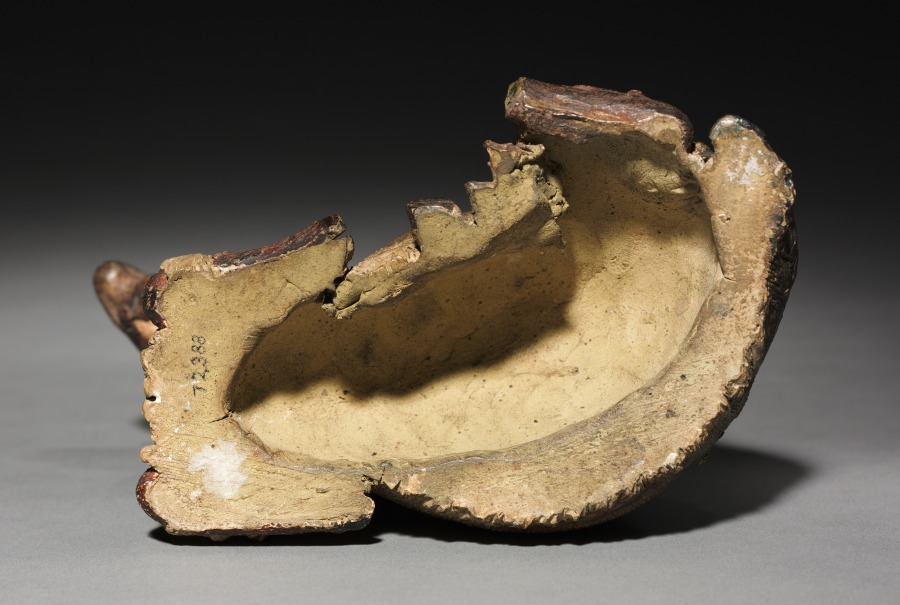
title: Figure from a Crèche: Sitting Ram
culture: Italy, Naples, late 18th-early 19th century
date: 1780–1830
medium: painted terracotta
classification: Sculpture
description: The practice of creating scenes of the Nativity for the home dates from the early 1700s in Italy, where people began to set up doll-like figures of about a foot or less in height. The custom was particularly popular in Naples around 1800, where crèche scenes (crèche means cradle, or crib) included many figures, whose heads and hands of painted terracotta, stuffed cloth bodies, and clothing adapted from contemporary local costumes gave them an amazingly realistic character. Representations of the birth of Jesus can be traced to the first few centuries of Christianity. Both living creatures and sculptural depictions of them were used from early times. By the late middle ages it was customary to create life-size figures of wood or stone, naturalistically painted, to represent the characters who participated in the events of Jesus's early life. These sculptures were then arranged in scenes illustrating one or both of the most important of these events, the Adoration of the Shepherds and the Adoration of the Magi-the three kings from the East who came to pay homage to the Christ child. Used in churches, these large figures were especially popular in Italy, Central Europe, Spain, and Portugal. This Object in Focus presentation was organized by Henry Hawley, Curator of Renaissance and Later Decorative Arts and Sculpture.